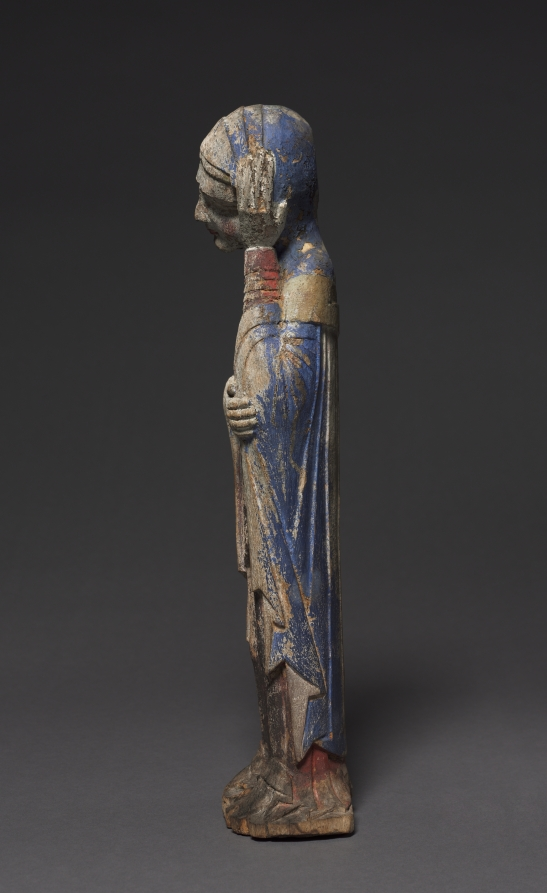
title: Mourning Virgin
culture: Austria, Region of Salzburg, Lungau?, 13th century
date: c. 1240–1260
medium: painted wood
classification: Sculpture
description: These traditional devotional figures at one time formed a Crucifixion group with a Crucified Christ (now lost). The ensemble may have been mounted high above the entrance to the sanctuary of a church on a barrier called a rood beam, beyond which lay people were not allowed. Crucifixion groups were common in medieval churches where they symbolized the sacrifice and real presence of Christ in the Mass.